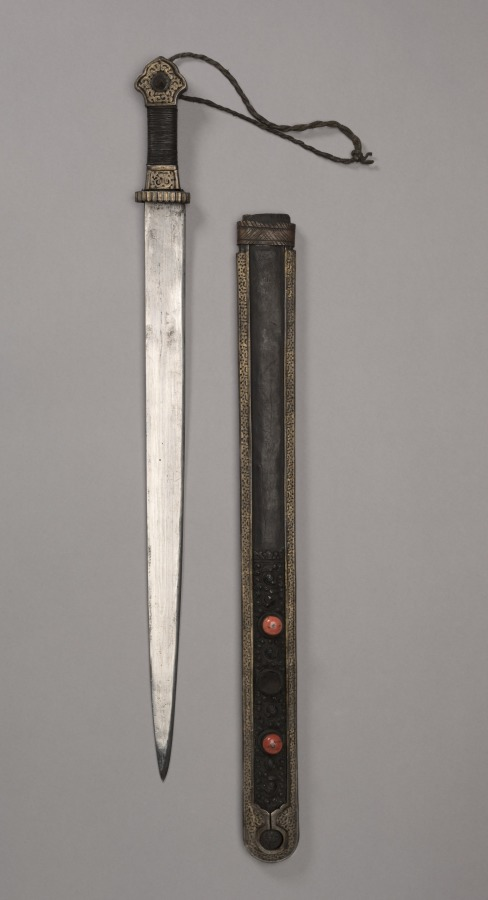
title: Sword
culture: India, Bhutan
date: 1800s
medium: iron with gilt and leather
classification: Arms and Armor